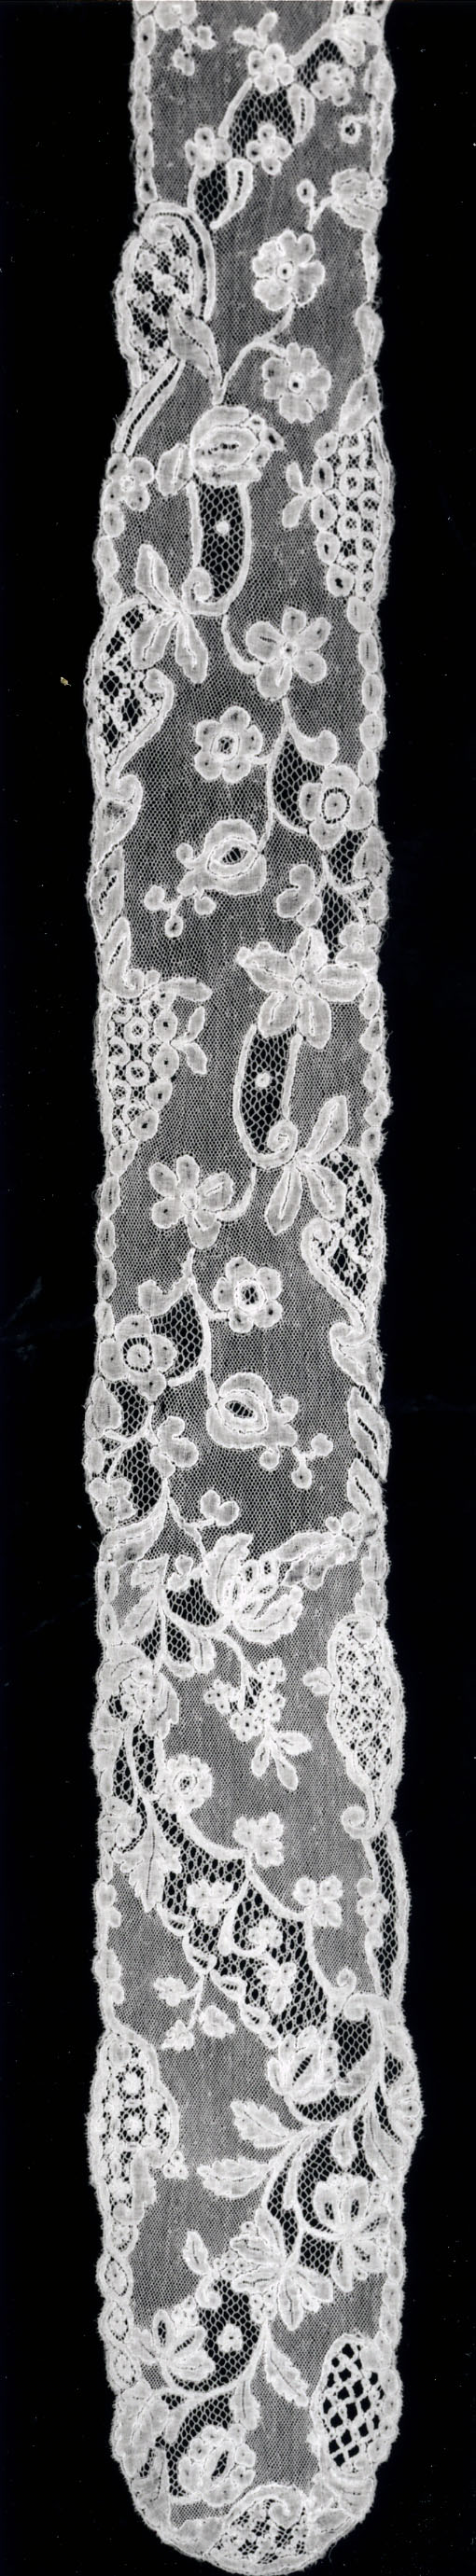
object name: Costume and Accessories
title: Pair of Lappets (Joined)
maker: Belgium, Flanders, Mechlin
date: 1760/65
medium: Linen, bobbin straight lace of a type known as "Mechlin" with a Mechlin mesh ground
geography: Mechelen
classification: costume accessory; lace - bobbin; textile; costume; costume accessory - headdress; costume accessory worn above the waist